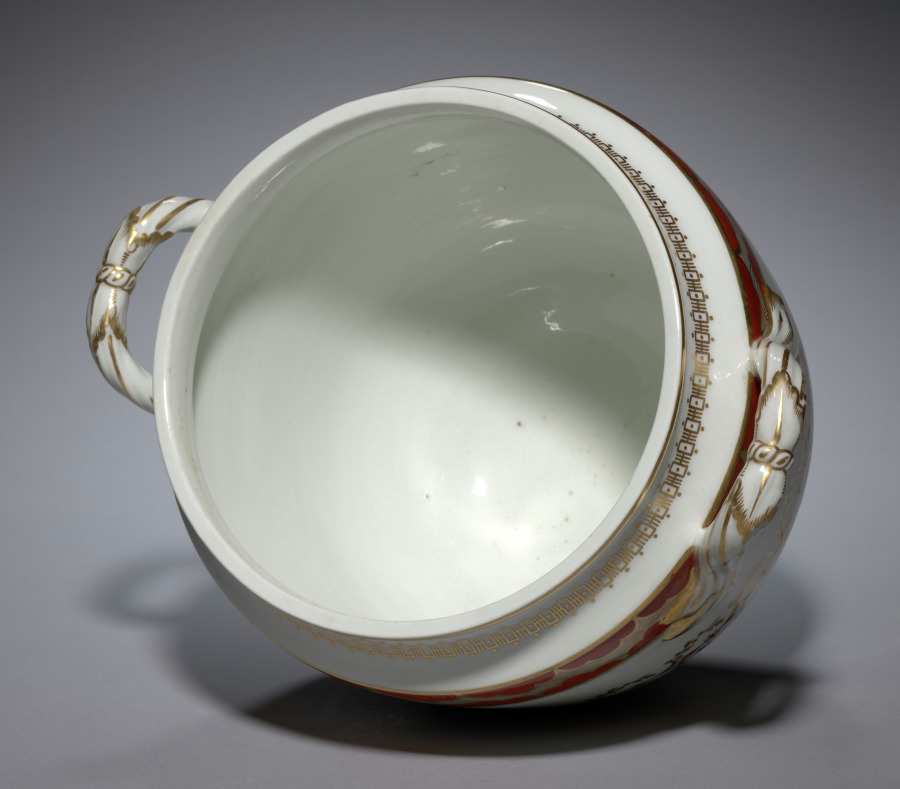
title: Ice Pail (2 of 2)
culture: England, late 18th-early 19th Century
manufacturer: Flight & Barr (British)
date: c. 1792–1804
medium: porcelain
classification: Ceramic